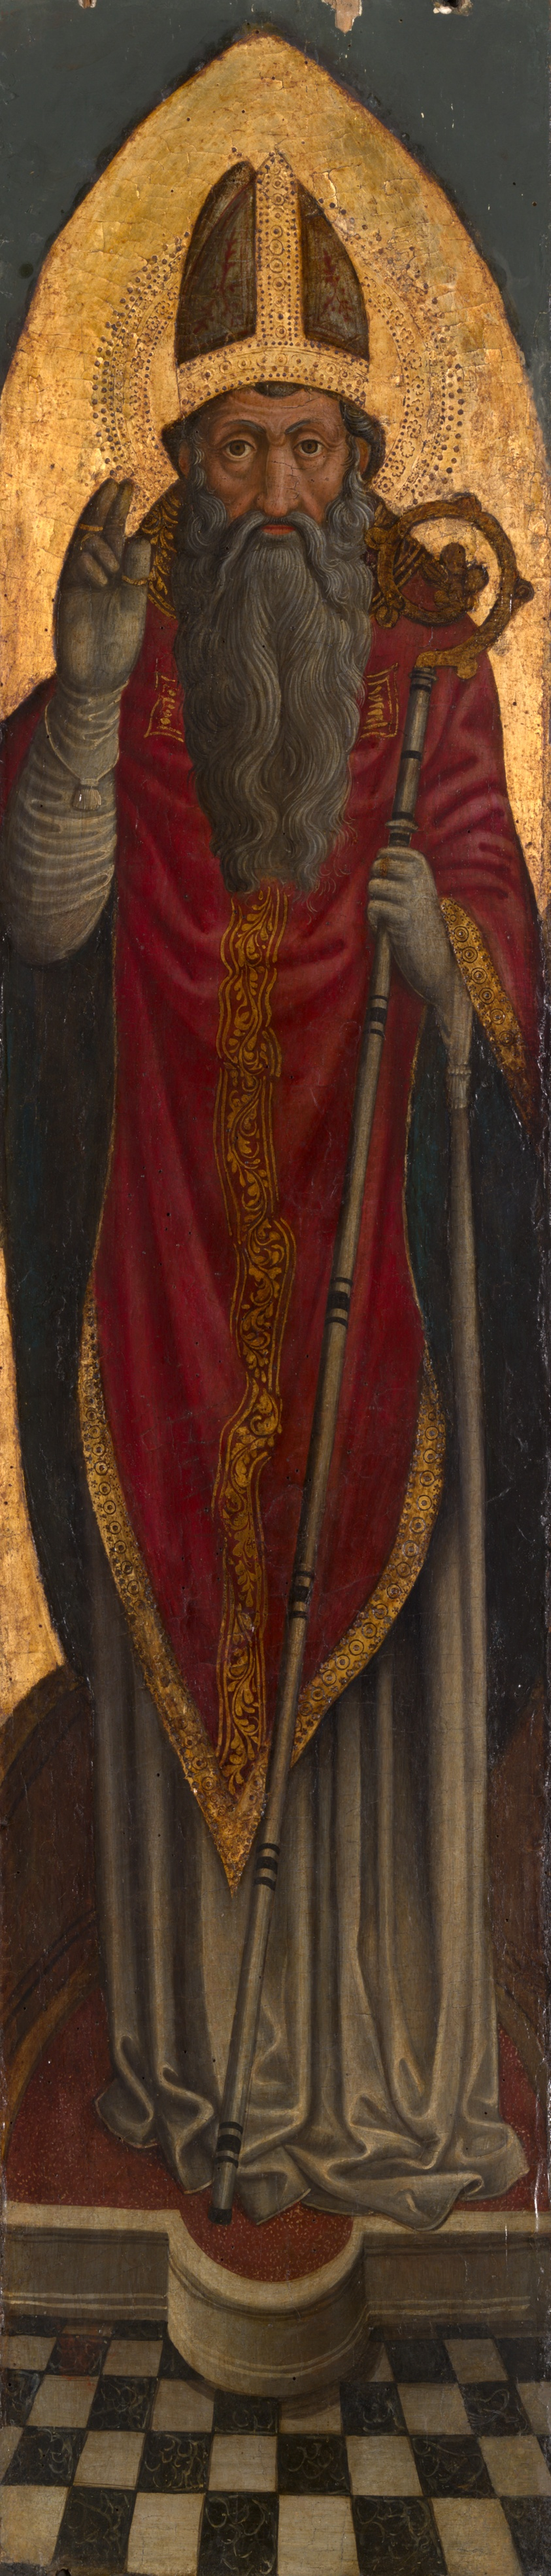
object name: Painting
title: Bishop Saint from an Augustinian altarpiece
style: 15th century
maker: Italian; Venice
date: 1450/75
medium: Tempera and oil on panel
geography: Venice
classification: tempera; altarpiece; altar; Italian; oil on panel; oil paintings (visual works); paint; painting; european painting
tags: saints, altar, Christian subjects, Christianity, men, religion, religious, religious attire, religious figures, staffs